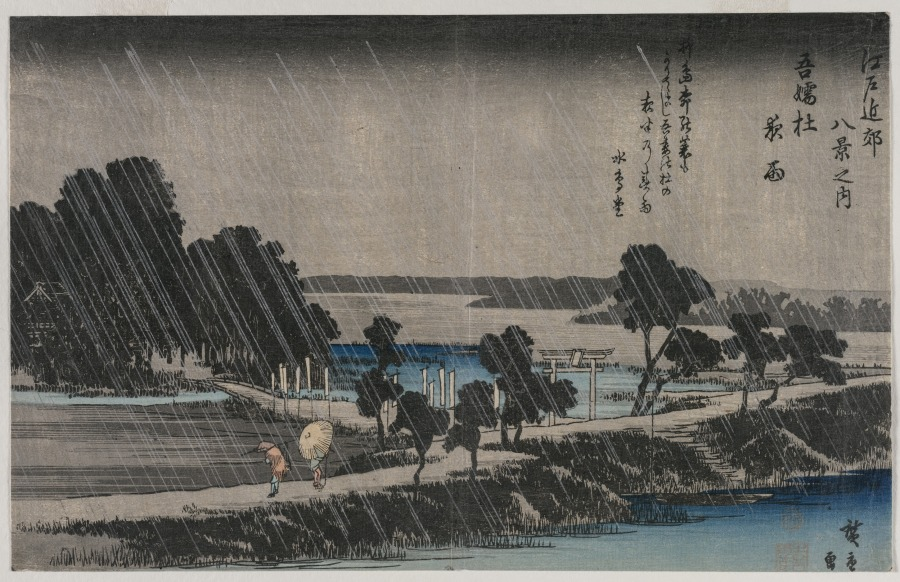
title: Night Rain at the Azuma Shrine (from the series Eight Views of the Environs of Edo)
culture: Japan, Edo period (1615–1868)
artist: Utagawa Hiroshige (Japanese, 1797–1858)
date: mid-1830s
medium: color woodblock print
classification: Print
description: Here Hiroshige reinterprets the traditional Chinese poetic and artistic theme of Eight Views of Xiaoxiang, a scenic region in southeast China. Inspired by “rain at night on the Xiaoxiang,” Hiroshige instead places travelers near Azuma Jinja Shrine in an Edo (present-day Tokyo) suburb. Synthetic blue pigment, imported from the West and wildly popular in the early 1800s, adds vibrancy to the muted landscape. Thin, ruler-straight diagonal lines of white ink evoke the driving rain.